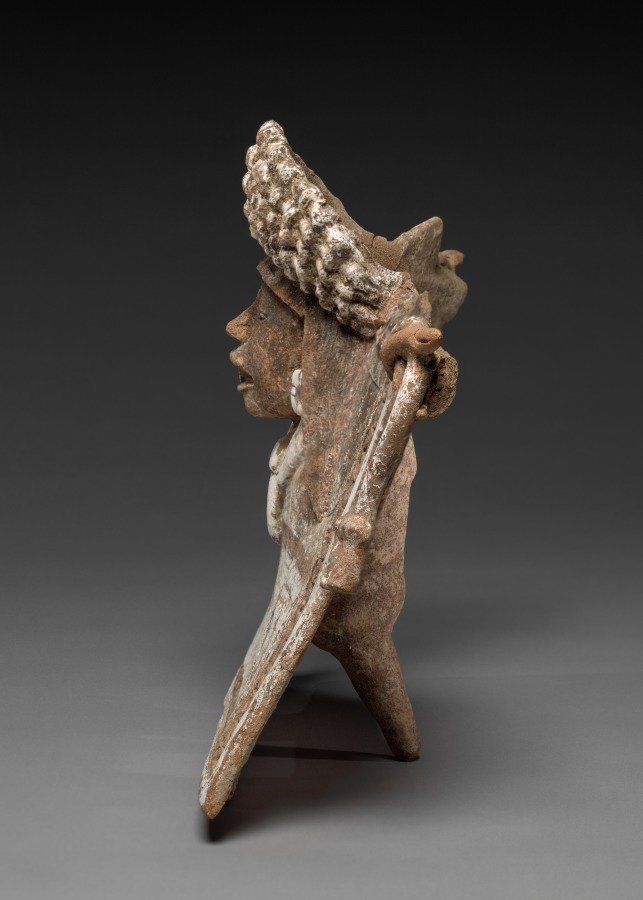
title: Standing Female Figure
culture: Mesoamerica, Veracruz, Nopiloa style?, 7th-10th century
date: 600–1000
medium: ceramic, pigment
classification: Sculpture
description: Ancient Veracruz artists used ceramic to create figural sculptures in a range of sizes, styles, and types. This beautiful, finely wrought female figure is an exceptional example. Although her identity is unknown, her adornments signal high status: ear ornaments, a large necklace, an elaborate dress that drapes over her outstretched arms, and perhaps even her front teeth, filed into a T shape, may have symbolic importance. The unfinished back, with a tripod support, suggests that the figure was meant to be seen from the front.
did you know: This lovely female’s body is a flat plaque supported by a tripod at the rear.